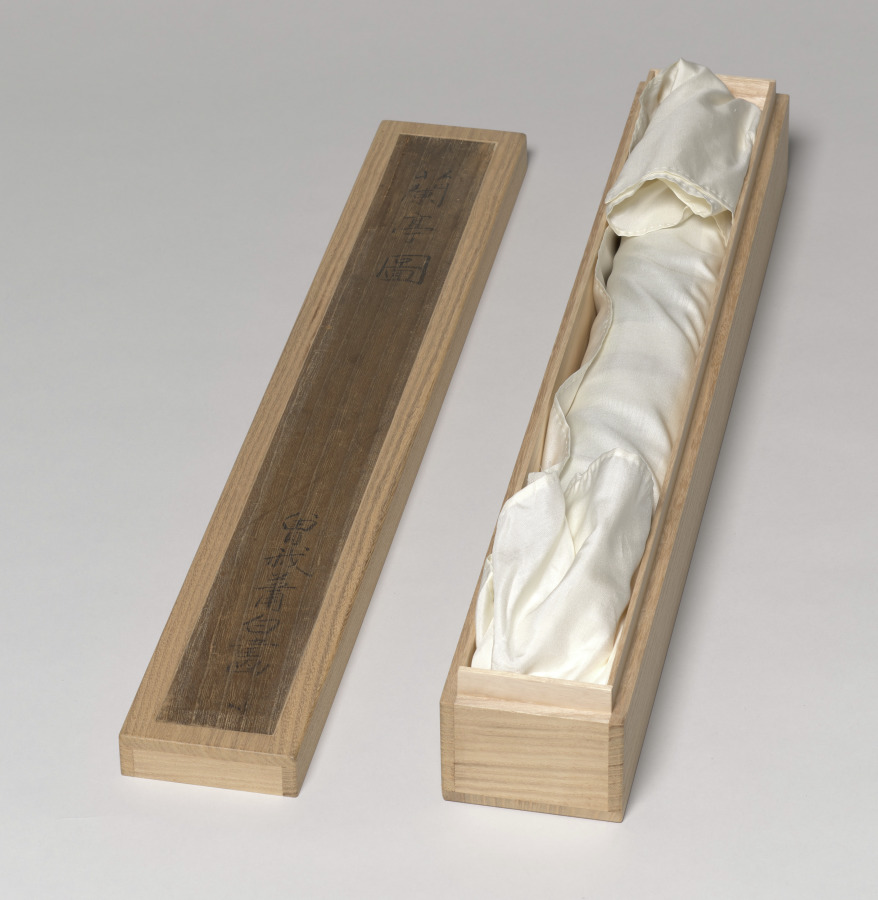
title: Orchid Pavilion Gathering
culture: Japan, Edo period (1615–1868)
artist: Soga Shōhaku (Japanese, 1730–1781)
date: 1777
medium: hanging scroll; ink on silk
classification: Painting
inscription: Inscribed upper right: Sixth year of An'ei (1777) mid-winter, Soga Shohaku Seal: Dasokken Shohaku Seal: Unread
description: This painting depicts a famous gathering that took place in China in AD 353 to celebrate the Spring Purification Festival, also known as the Double Third Festival, as it takes place on the third day of the third lunar month. The host invited everyone to the Orchid Pavilion to compose poetry and drink wine. Guests floated wine cups down a nearby creek, and where they landed, people had to drink the wine and compose a poem.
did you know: The Buddhist temple Bairinji in Kurume City, Fukuoka prefecture, Japan, and the National Gallery of Victoria in Melbourne, Australia, own compositions by the same artist on the same theme.